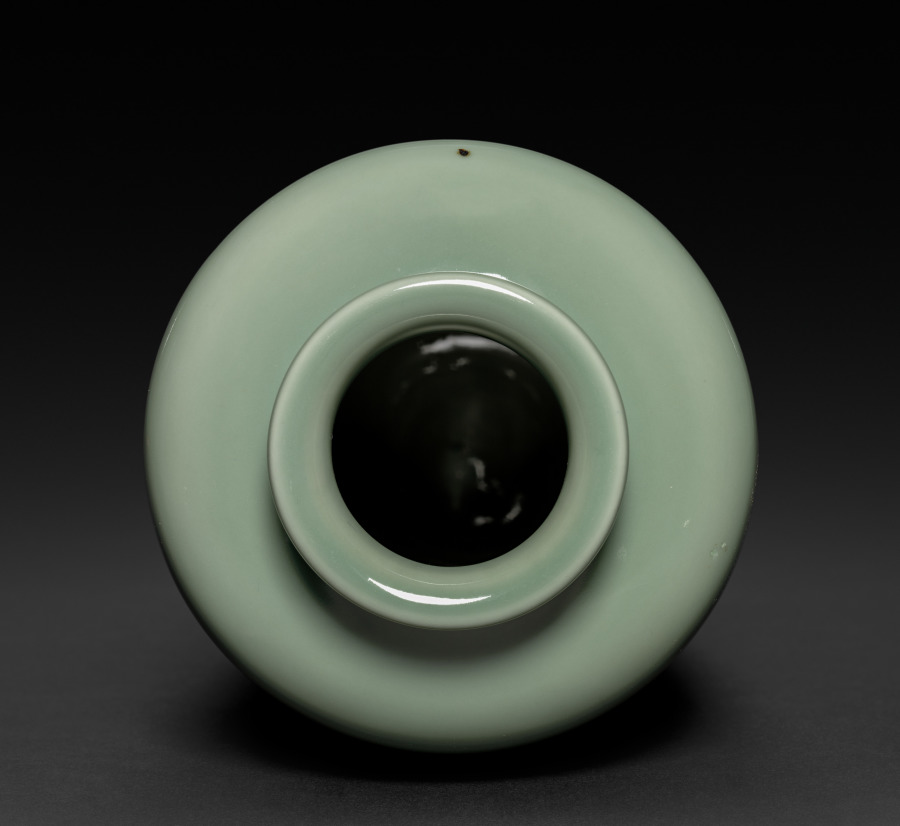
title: Tong-shaped Vase with Band of Cloud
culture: Japan, Meiji period (1868–1912)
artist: Seifū Yohei III (Japanese, 1851–1914)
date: 1893–1914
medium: Porcelain with molded and carved design and green glaze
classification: Ceramic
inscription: 清風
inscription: 帝室技芸員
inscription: 金聲玉振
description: Many of the vases created by Yohei III and IV were made with reference to and in emulation of Chinese ceramics in both form and glazing. The vessel type called tongping, pronounced tōbin in Japanese, is tall and cylindrical, like the thick length of bamboo referenced in the shape of the ideograph tong 筒. Unlike the ancient gu, hu, and guan, this form did not emerge in China until the Ming dynasty, and many such vases date to the early Qing dynasty. Two green-glazed vases, this one by Yohei III and the other by Yohei IV CMA 2022.228, are interpretations of this form. Yohei III’s version has slightly hunched shoulders and is somewhat wider at the top below the small neck and lip. Yohei IV’s vase is more angular. The wide rack of molded cloud encircling the Yohei III vase rises subtly from very low relief banding above and below it, accentuating the vessel’s rounded edges and complementing the form. In contrast, the allover flower vine pattern on the body and “seven treasures” pattern at the collar of the vase by Yohei IV evokes a garment’s cuffed sleeve, like the common English appellation for this type of vessel—“sleeve vase.”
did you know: Seifū Yohei III mined the repertoire of Chinese vessel types, from ceramics modeled after ancient ritual bronzes to shapes developed in the Yuan (1279–1368) and Ming (1368–1644) dynasties.